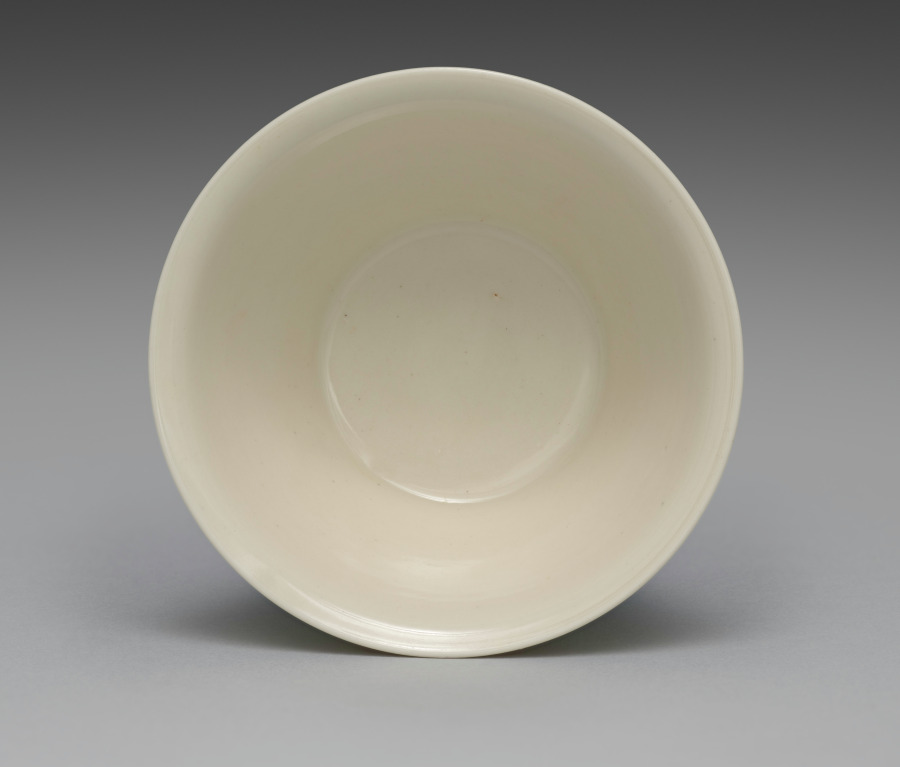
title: Teacup from Teacups with Floral Band Motif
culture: Japan, Meiji period (1868–1912)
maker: Seifū Yohei III (Japanese, 1851–1914)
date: 1893–1914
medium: One from a set of five cups; porcelain with incised decoration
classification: Ceramic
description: The five sencha teacups in this set are decorated with incised flowers and dots between a double band at the top and a single band at the bottom. They are in Yohei III’s creamy taihakuji body and glaze. In their motifs, they are quite similar to an incense burner by Yohei III (see CMA 2022.180), but the flowers are even more simple in design, with no open circle at the center. A label affixed to the side of the box refers to them as “sencha cups in emulation of Korean white [ware].” The reference to Korean ware indicates that even though Yohei was more directly inspired by Qing-dynasty wares from the Dehua kilns in Fujian Province in developing his porcelain clay and glaze for works such as these, the general understanding of the continental models still placed them, at least in terms of color, among pieces broadly associated in Japan with Korean white wares. The delicate cups are thinly potted, so they have a highly desirable translucency.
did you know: The delicate cups in this set are thinly potted, so they have a highly desirable translucency.